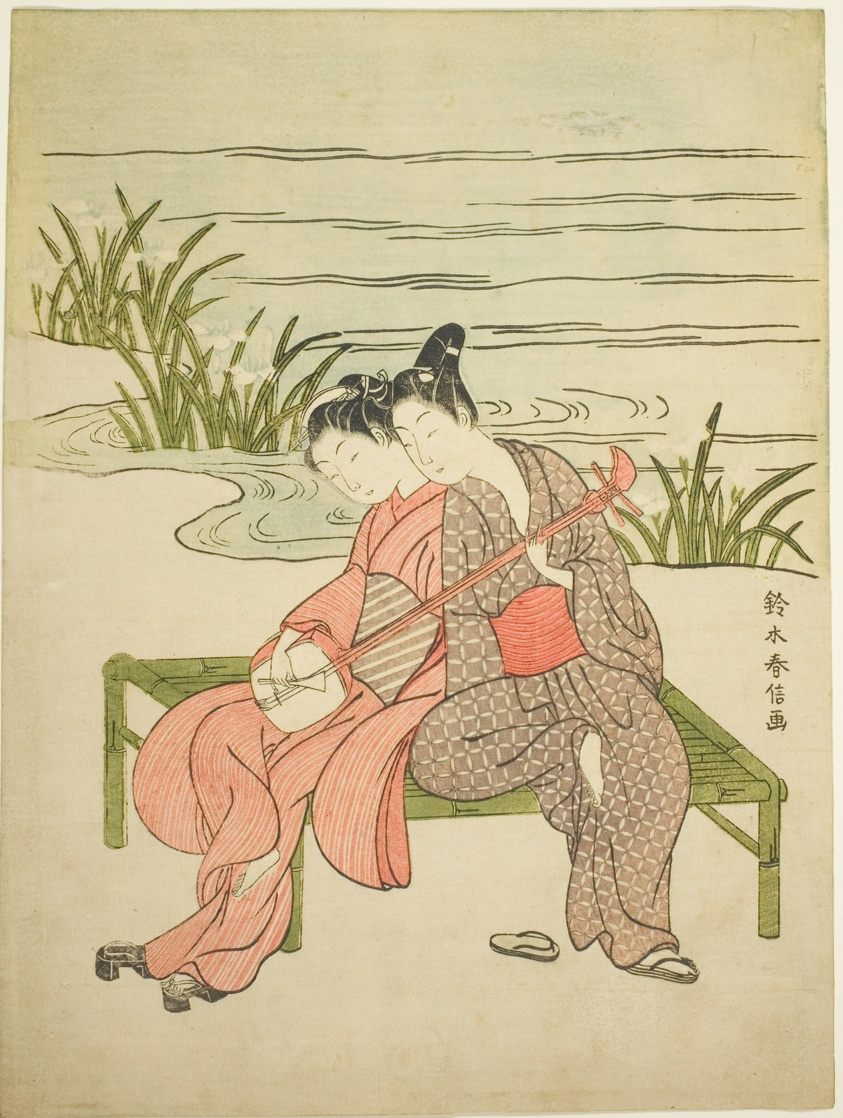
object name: Print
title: Lovers Playing the Same Shamisen (parody of Xuanzong and Yang Guifei)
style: Japanese (culture or style)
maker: Suzuki Harunobu 鈴木 春信; Japanese, 1725 (?)-1770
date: c. 1767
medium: Color woodblock print; chuban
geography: Japan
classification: woodblock print; print; asian art